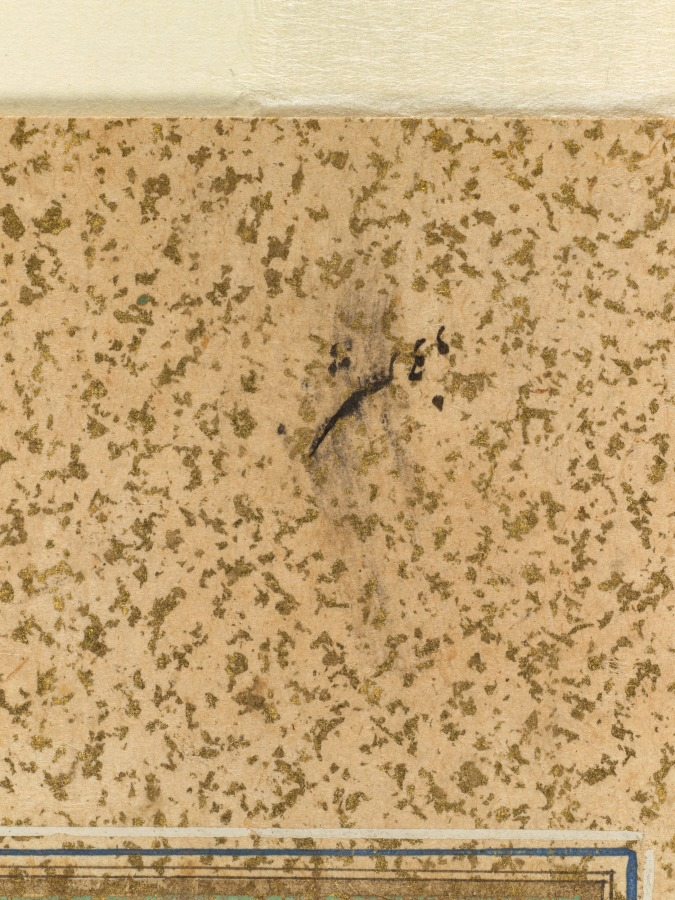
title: A Mughal courtier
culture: Mughal India, court of Akbar (reigned 1556–1605)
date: c. 1575; border added probably 1700s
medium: Gum tempera and gold on paper, mounted with gold-sprinkled borders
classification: Painting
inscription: Inscription in top margin, upside-down in nasta‘liq script, probably added c. 1700s: Sarkhod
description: This sensitive portrait is among the earliest surviving individual portraits from the Mughal atelier. He remains unidentified by inscription, since such portraits were made for the emperor Akbar who was unable to read. Realism in portraiture developed under Akbar as a means of keeping records of gifts and promotions without written notations. The figure conspicuously grasps the maroon and gold scarf in his left hand, which suggests that it may have been the gift from the emperor that would have occasioned the portrait. The array of blades he carries indicates that he was conscripted into military service at the Mughal court.